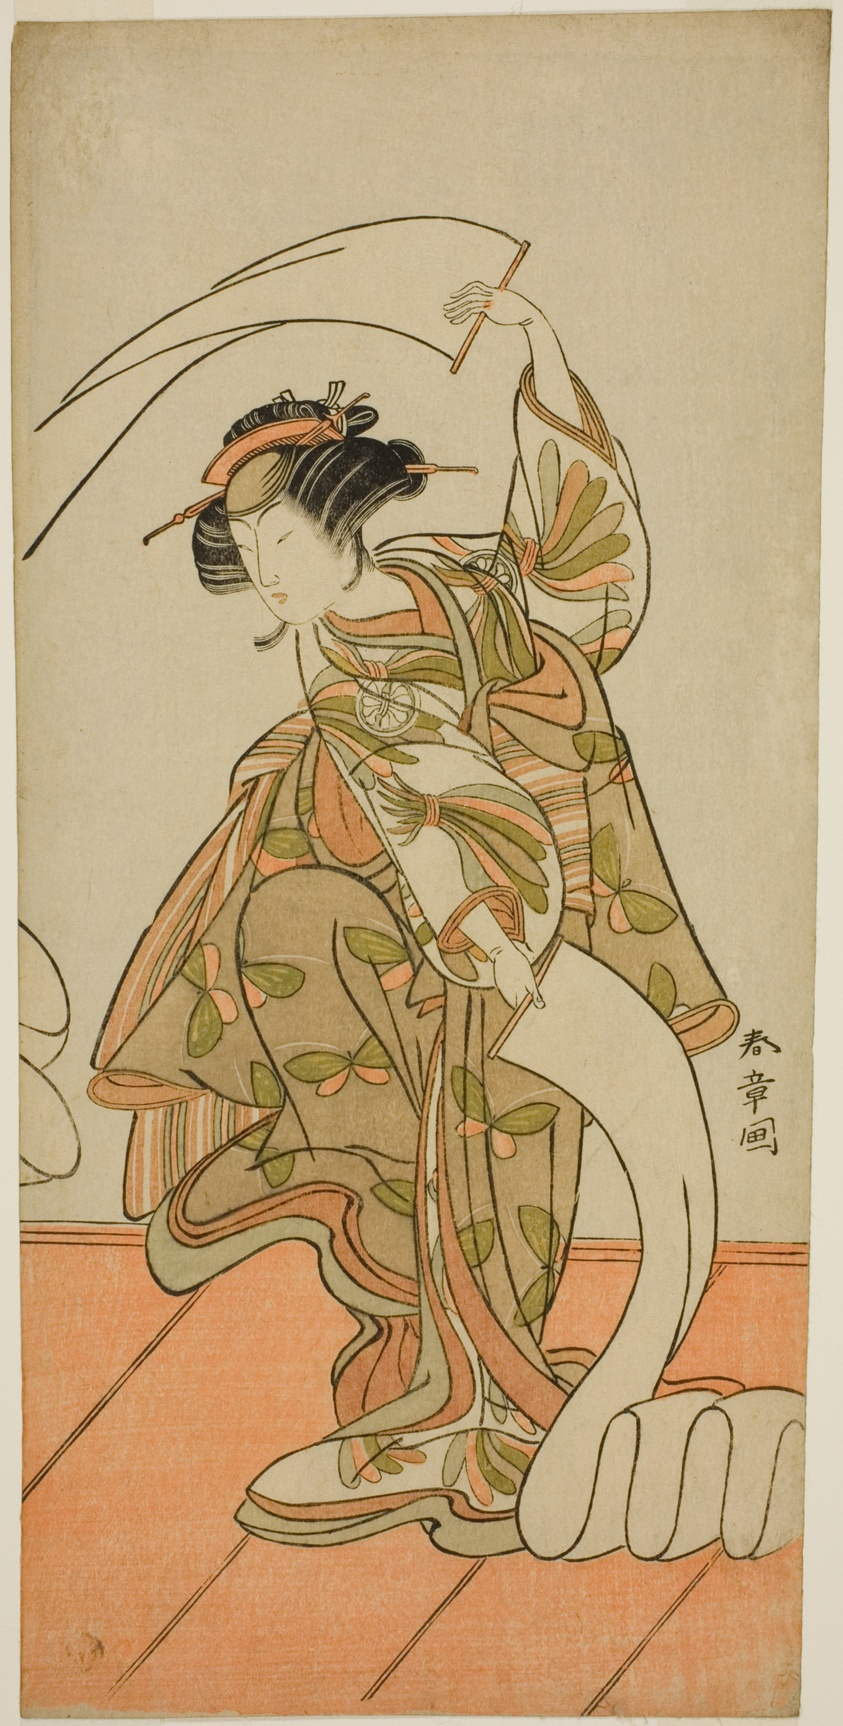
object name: Print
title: The Actor Segawa Kikunojo III as the Courtesan Kisegawa in a "Nuno Sarashi" Dance, in the Play Hana-zumo Genji Hiiki, Performed at the Nakamura Theater in the Eleventh Month, 1775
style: Japanese (culture or style)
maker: Katsukawa Shunsho 勝川 春章; Japanese, 1726-1792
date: c. 1775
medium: Color woodblock print; hosoban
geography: Japan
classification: woodblock print; print; asian art